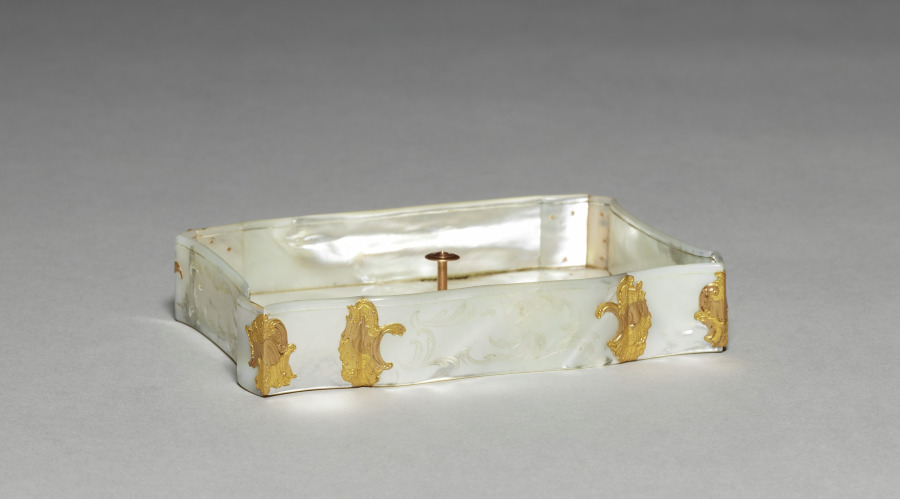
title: Drawer from a Sewing Box (Nécessaire)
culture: Austria, possibly Vienna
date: c. 1765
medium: gold and mother-of-pearl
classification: Miscellaneous